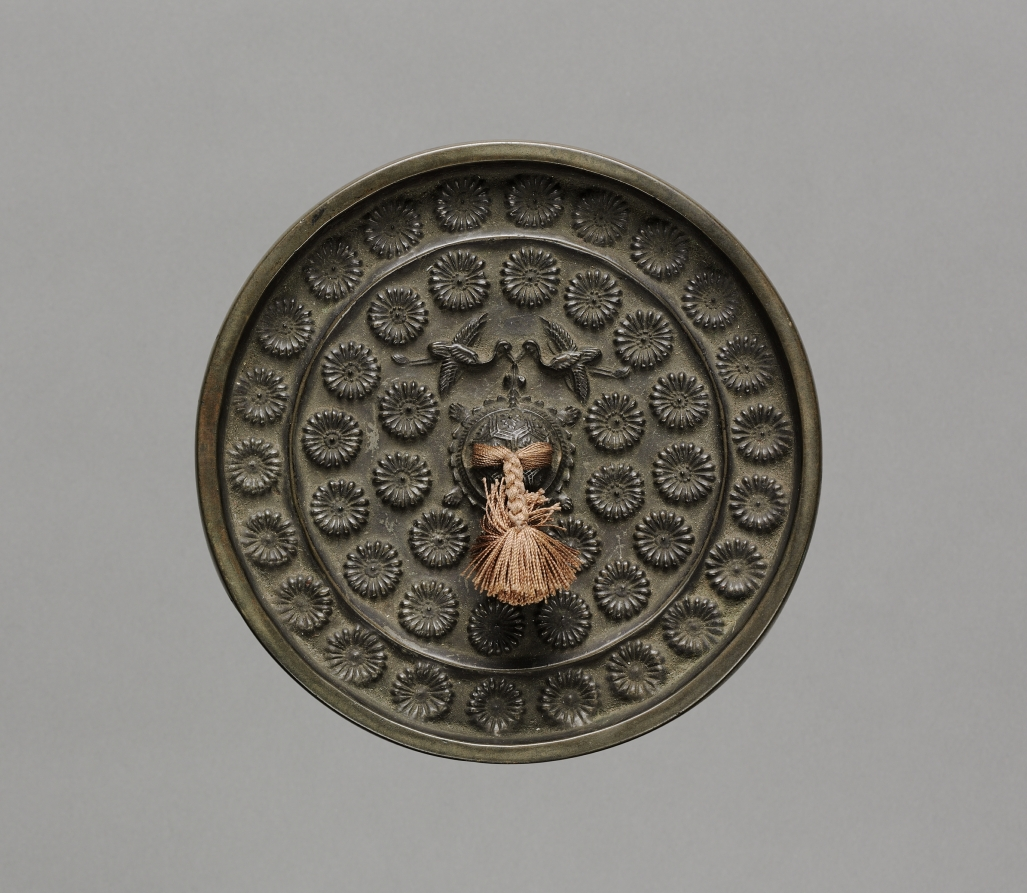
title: Mirror with Pair of Cranes in Chrysanthemum Pattern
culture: Japan, Muromachi period (1392–1573)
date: 1392–1573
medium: bronze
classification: Metalwork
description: The Japanese used chrysanthemums as decorative elements on mirrors. In the Heian period, a chrysanthemum with cranes or long-tailed birds was a common motif. Later, in the Kamakura and Muromachi periods, chrysanthemum designs were divided into three patterns with different symbolic associations: Chrysanthemum with Cranes represented longevity; Water Flowing suggested longevity as well as the Noh drama Kikujido, or Chrysanthemum Boy; and East Fence alluded to the poem "Drinking Wine" by Tao Yuanming (AD 365-427). Here, the mirror featuring Buddhist iconography (kyojo) and a chrysanthemum design on the back shows that the flower was also appreciated in the context of Buddhism in the Kamakura period.